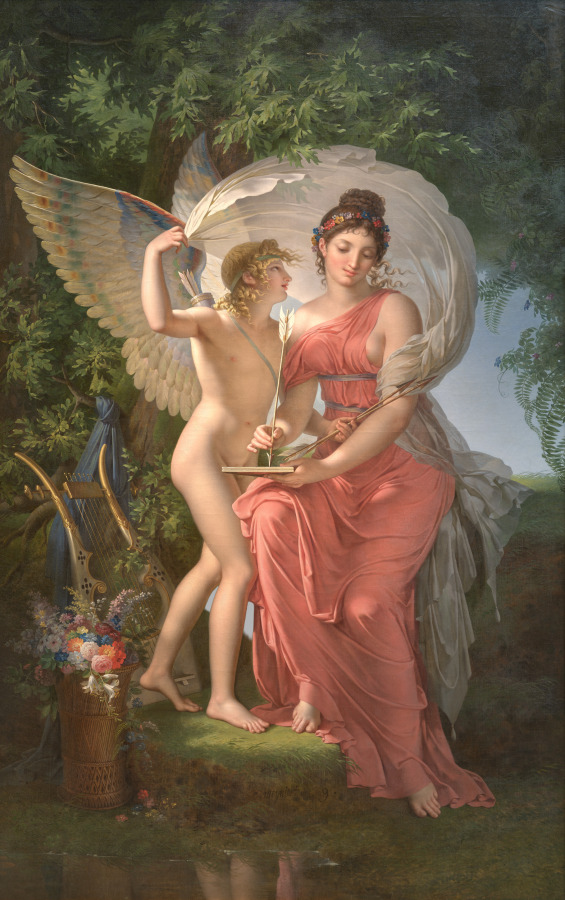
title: Erato, Muse of Lyrical Poetry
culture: France, late 18th-early 19th century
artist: Charles Meynier (French, 1768–1832)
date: 1800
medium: oil on canvas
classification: Painting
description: Erato, the muse of lyric and erotic poetry, is often depicted with a golden arrow received from Eros or Cupid, a sign of the emotion that inspires her.